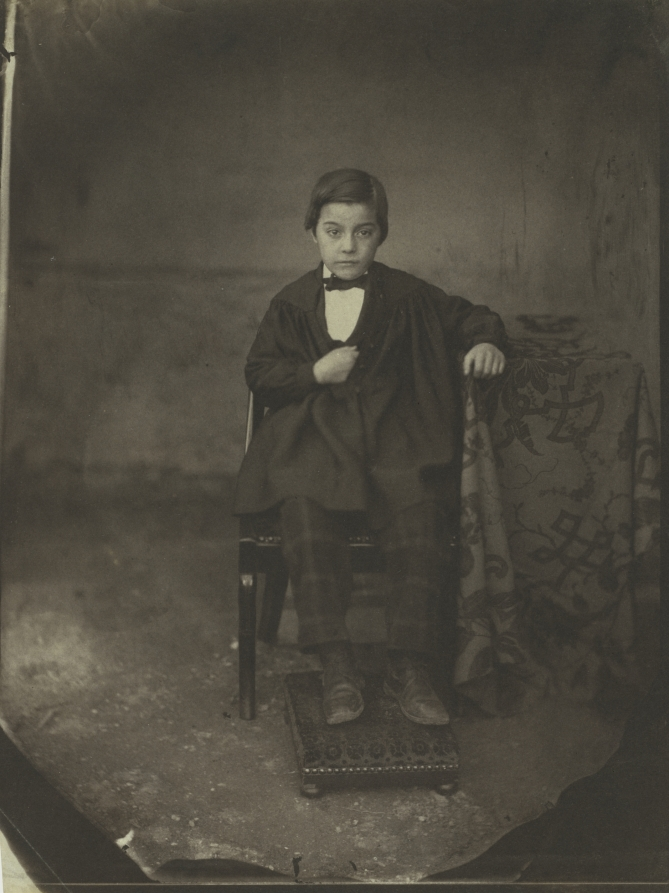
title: Portrait of a Young Boy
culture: France, 19th century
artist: Louis-Adolphe Humbert de Molard (French, 1800–1874)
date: c. 1848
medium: salted paper print from albumen on glass negative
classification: Photograph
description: Baron Humbert de Molard, a wealthy amateur, began taking daguerreotypes of his friends, family, and servants in 1843. The following year he became one of the earliest Frenchmen to experiment with paper print processes. This salted paper print was made from a glass-plate negative sensitized with albumen. The stiff pose, placement of the subject’s hands, and glaring gaze are likely due to the long exposure time required by those materials. They imbue a young boy with the gravity and formality of a much older man.